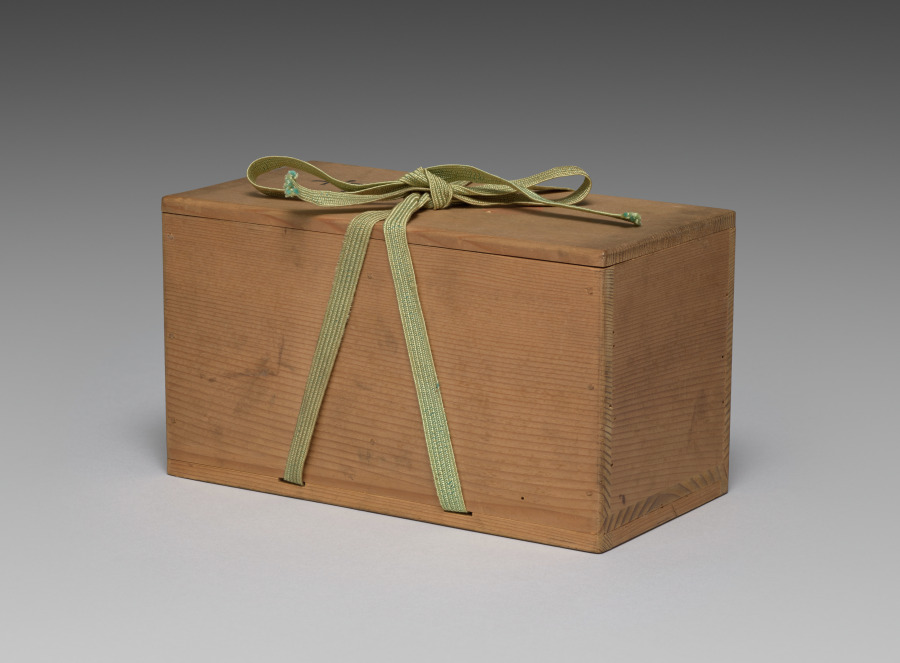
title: Saucers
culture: Japan, Meiji period (1868–1912)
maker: Seifū Yohei III (Japanese, 1851–1914)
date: 1893–1914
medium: Set of ten saucers; porcelain with green glaze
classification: Ceramic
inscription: 清風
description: Yohei III’s main output for his sophisticated clientele was in the form of tea sets and dining sets. He created a range of dishes in green glazes. He often produced in pairs, sets of five, or sets of ten. For this set of ten small dishes in a simple, round form that emphasizes the glaze above all, the box lid designates the piece as seiji, or green-glazed porcelain, using a general term for the extensive palette of green glazes often called celadon in English. The box lid further identifies the dishes themselves as tōchō, literally “bean-sized saucers,” a size that makes them suitable for dipping sauces.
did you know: The ten dishes in this set are stored in stacks of five in a two-compartment box.